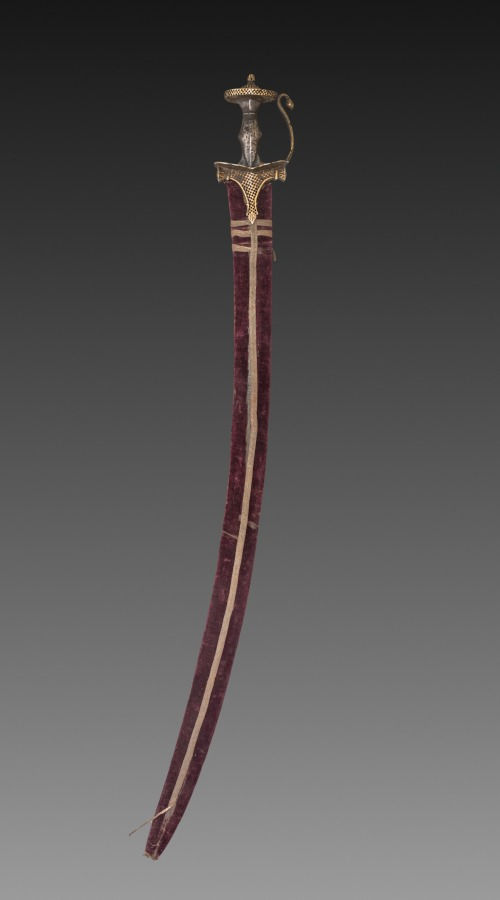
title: Tulwar sword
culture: India, probably Deccan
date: 1700s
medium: Iron hilt with gold; steel blade with gold; wood scabbard with velvet and metallic thread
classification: Arms and Armor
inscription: Help [comes] from God, and Victory is imminent.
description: This long curved sword and scabbard are of the kind used and worn by Mughal nobility, as seen often in paintings. The openwork hilt is a characteristic of swords from the southern Indian region known as the Deccan. By the end of the 1500s, the Mughals began making regular incursions into the Deccan as they attempted to expand their empire, increasing the exchange of art forms. Repeated four times, twice on one side of the blade and twice on the other in gold inlay, is the same line from the Qur'an 61:13: “Help [comes] from God, and Victory is imminent.” This is a popular inscription on daggers, banners, and other instruments of war, as it reassures the combatants that God is on their side, and therefore they can in good faith expect a speedy victory if they fight valiantly.